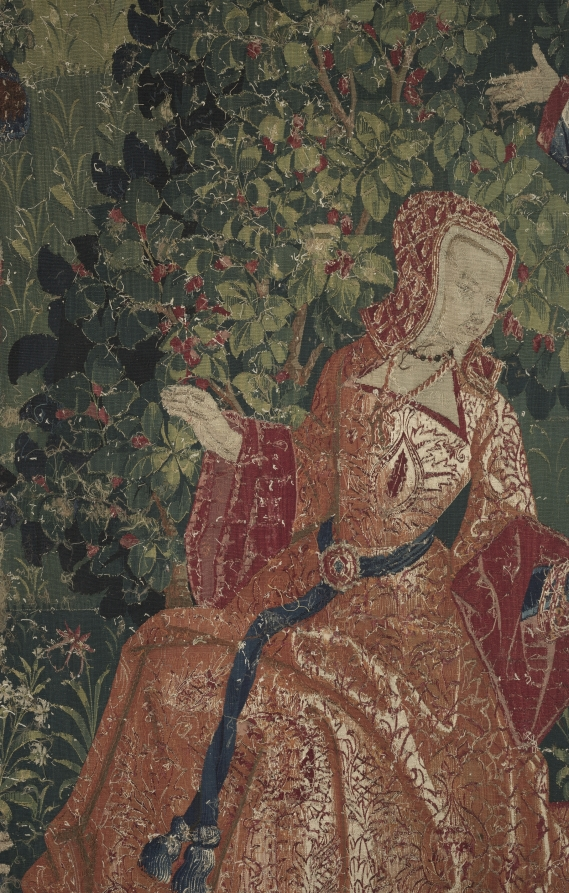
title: Youth (from Chateau de Chaumont set)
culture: France, Lyon(?), early 16th century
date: 1512–15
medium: silk and wool; tapestry weave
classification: Tapestry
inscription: French verse in Gothic letters translates as follows: Youth triumphs while its heart is healthy, And when it seems to hold all in its hand. But this triumph is without eternity. Here one sees the example full well: Those who are happy hide death in thier heart. Let the young heed this warning.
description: Louise of Savoy (1476-1531), queen mother of King Francis I, is depicted here in a sumptuous brocaded velvet in the center. She addresses youthful figures including Éléonore, Pierre Sala’s daughter who is facing her future husband, Hector. On the right, King Louis XII (died 1514) stands in front of the Chateau Langais where he had married Anne of Brittany. Above is Hector’s deceased father with a partially concealed skull under his robe, while a woman expresses surprise at the sight. The verse in Old French at the top states that youthful happiness is not eternal: Youth makes sounds as long as its heart is healthy, And thinks that it holds all in its hand. But this triumph is not eternal. Here you see clearly an example: He that is happy has death in his breast. Of this you people should take note.